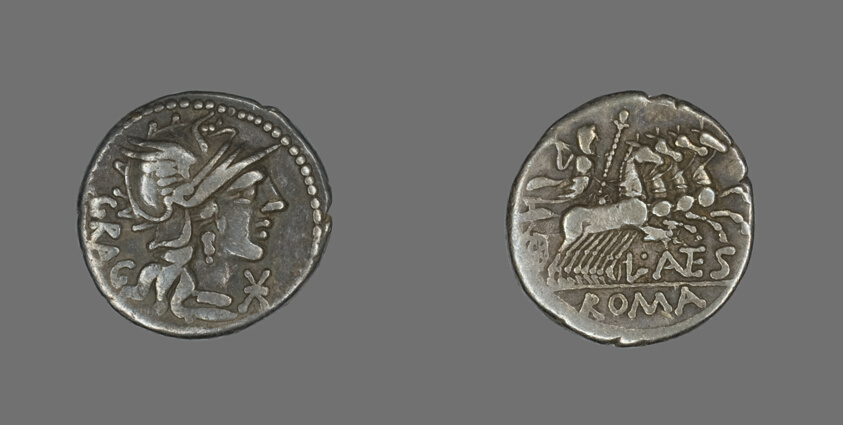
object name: Coin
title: Denarius (Coin) Depicting the Goddess Roma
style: roman (ancient, style or period), ancient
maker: Roman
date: about 136 BCE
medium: SIlver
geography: Roman Empire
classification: coin; ancient art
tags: Chariots